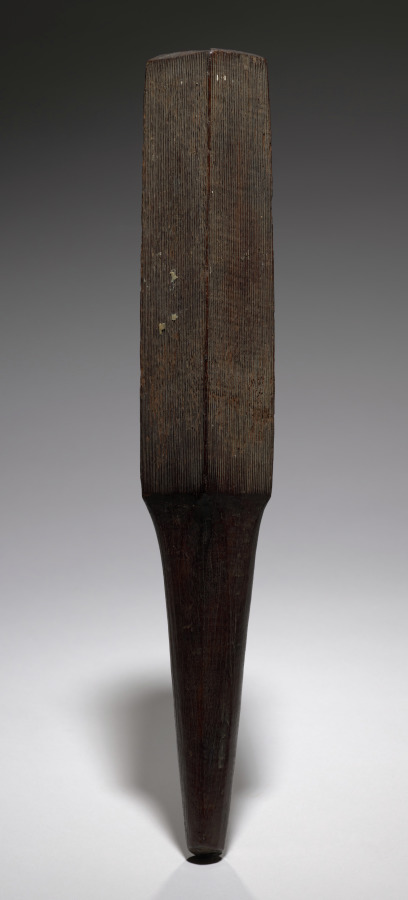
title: Tapa Cloth Beater (l'e kuku)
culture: Polynesia, Hawaii, 20th century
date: before 1930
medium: wood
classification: Sculpture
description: To make tapa, a decorated bark cloth, Hawaiian women used the four-sided beater to pound the inner bark of the paper mulberry tree, softened by a week of soaking in sea water. The cloth was beaten in several stages, starting with the most coarsely grooved side of the mallet and gradually reaching the finest grooved side. Although many Polynesian groups produced tapa cloth, only Hawaiian tapa cloth beaters were incised with a variety of "watermark" patterns. The prepared cloth was decorated with overlaying, cord snapping, free-hand painting, and printing techniques.